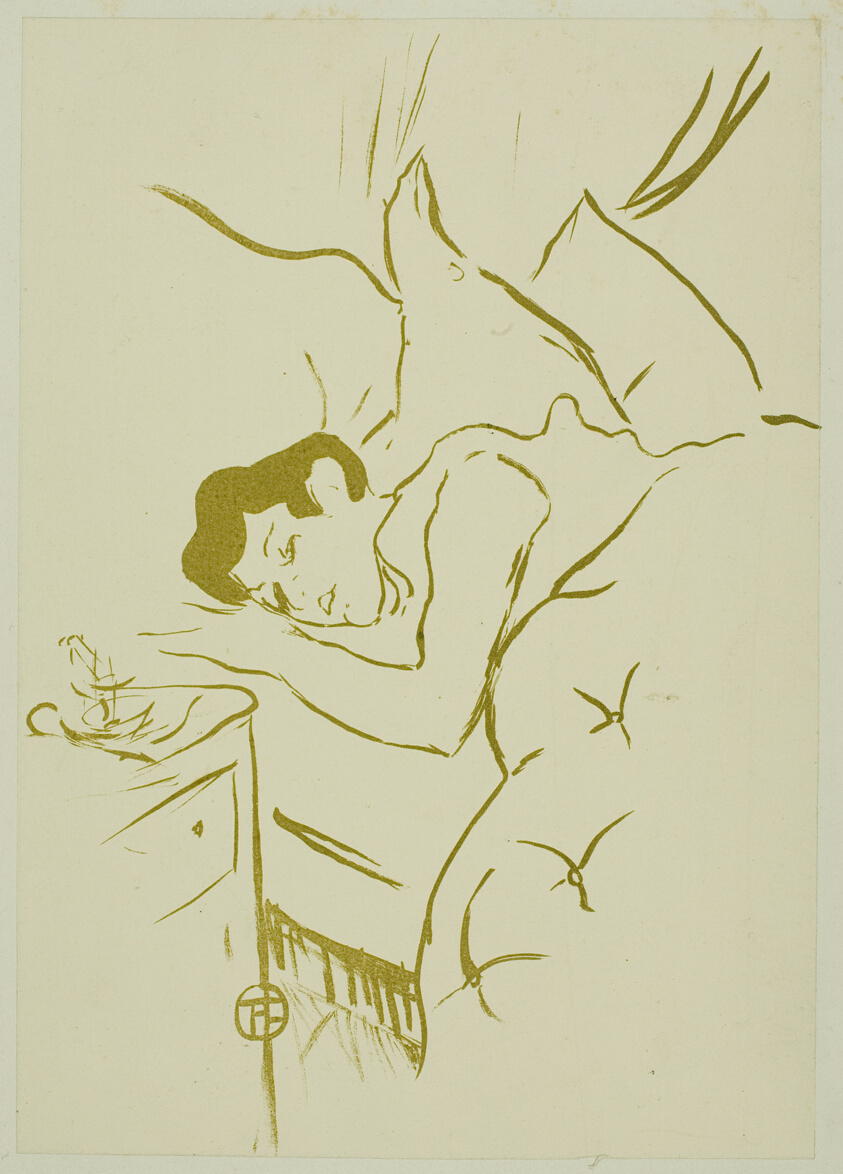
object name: Print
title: Your Mouth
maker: Henri de Toulouse-Lautrec (French, 1864-1901)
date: 1893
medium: Color lithograph on ivory wove paper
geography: France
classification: lithograph; print; prints and drawing